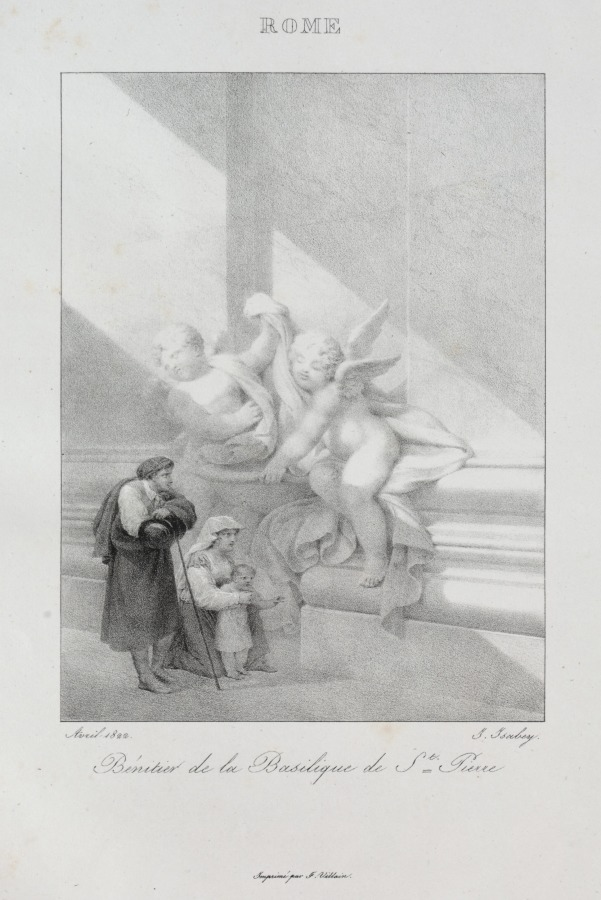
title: Voyage en Italie en 1822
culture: France, 19th century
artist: Jean-Baptiste Isabey (French, 1767–1855)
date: 1833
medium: lithograph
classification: Bound Volume